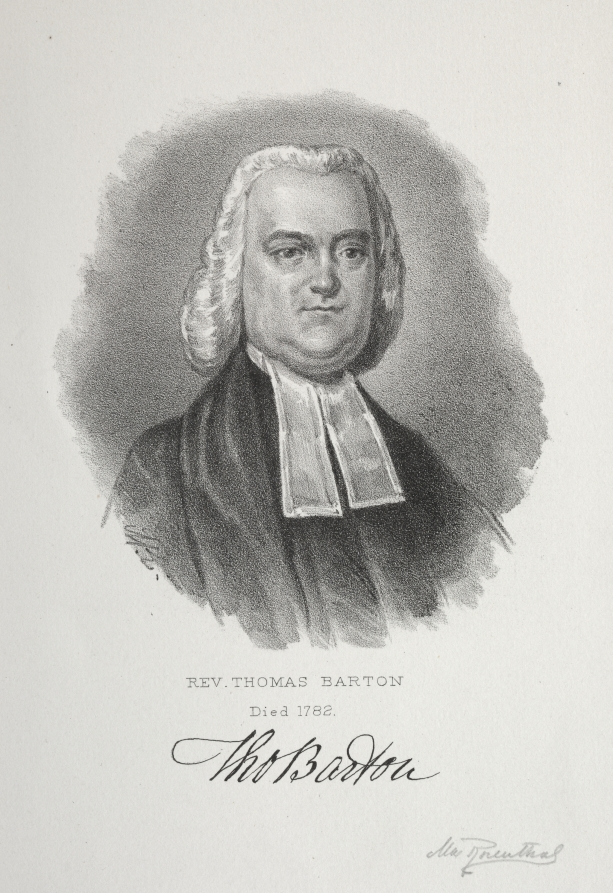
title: Rev. Thomas Barton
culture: America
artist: Max Rosenthal (American, 1833–1918)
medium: lithograph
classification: Print